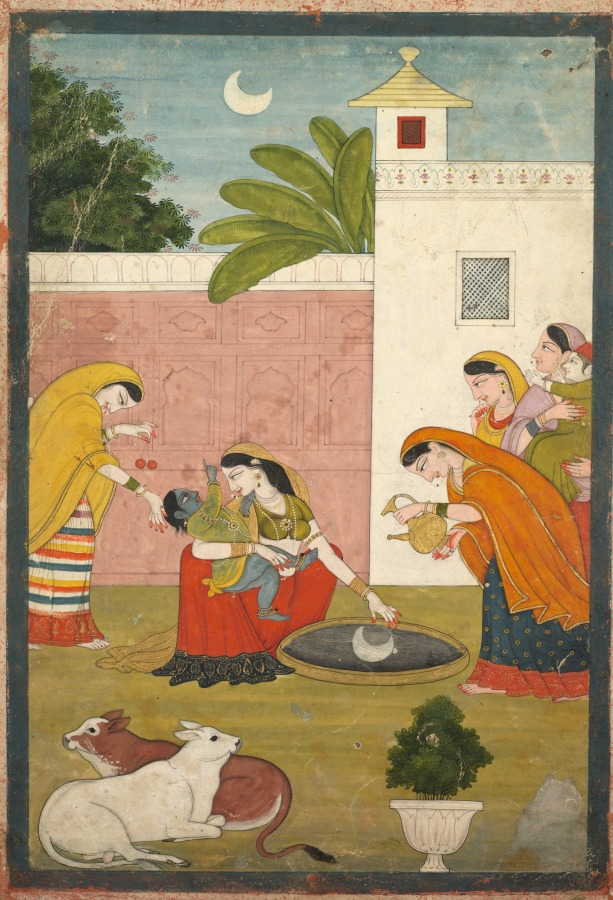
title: Krishna reaching for the moon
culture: Northern India, Pahari kingdoms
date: c. 1820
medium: Gum tempera, ink, and gold on paper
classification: Painting